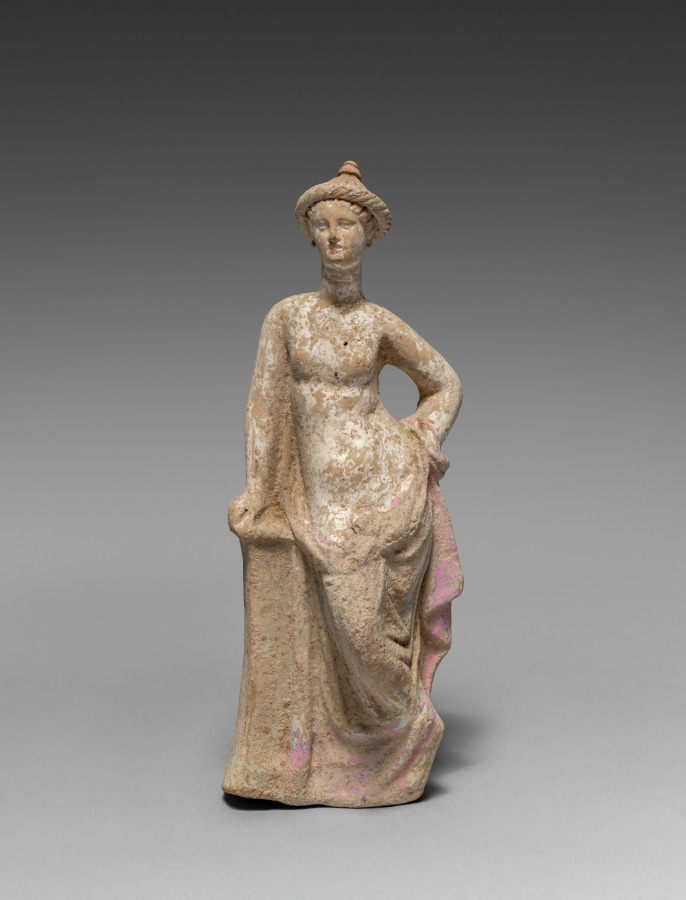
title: Figurine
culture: Greece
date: 300–100 BCE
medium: terracotta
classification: Sculpture